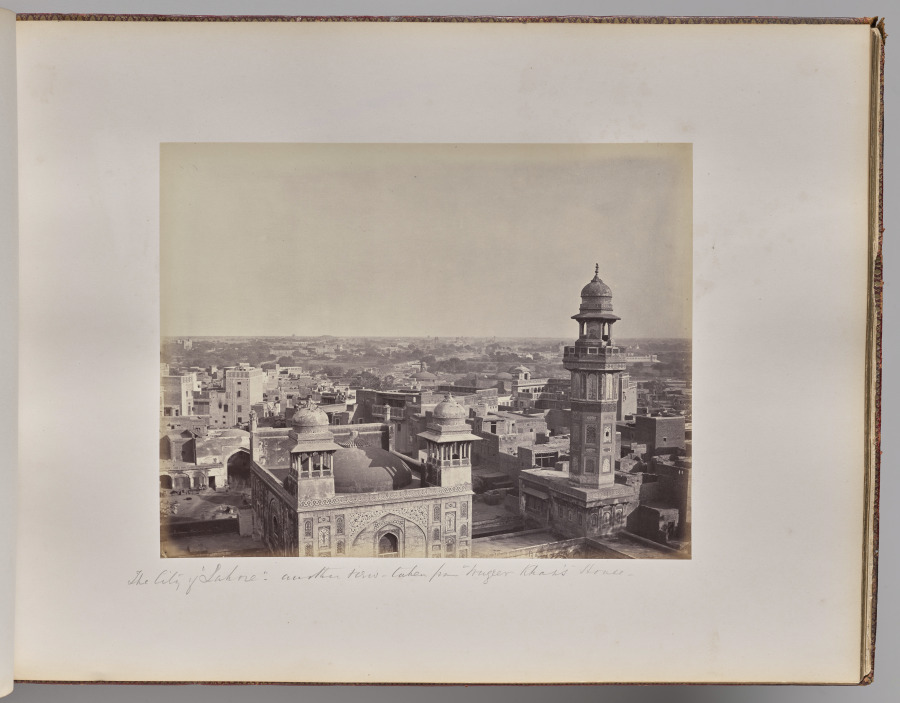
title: The City of Lahore. Another View Taken from Huzeer Khan's House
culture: England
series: Photographs of Northern India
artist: Samuel Bourne (British, 1834–1912)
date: 1863–70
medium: albumen print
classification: Photograph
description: The 50 images in this album, all taken in the 1860s, move from the hill towns of the Himalayas down to cities including Lahore (now in Pakistan), Delhi, Lucknow, Agra, Benares (now Varansi), and Calcutta (now Kolkata). Architectural studies of major monuments offer valuable historical records of what sites such as the Taj Mahal and the imperial mosque of the Mughal emperors in Delhi looked like before twentieth-century restorations.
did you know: Samuel Bourne, the author of most the images in this album, was a banker in England before he moved to India to become a professional photographer.